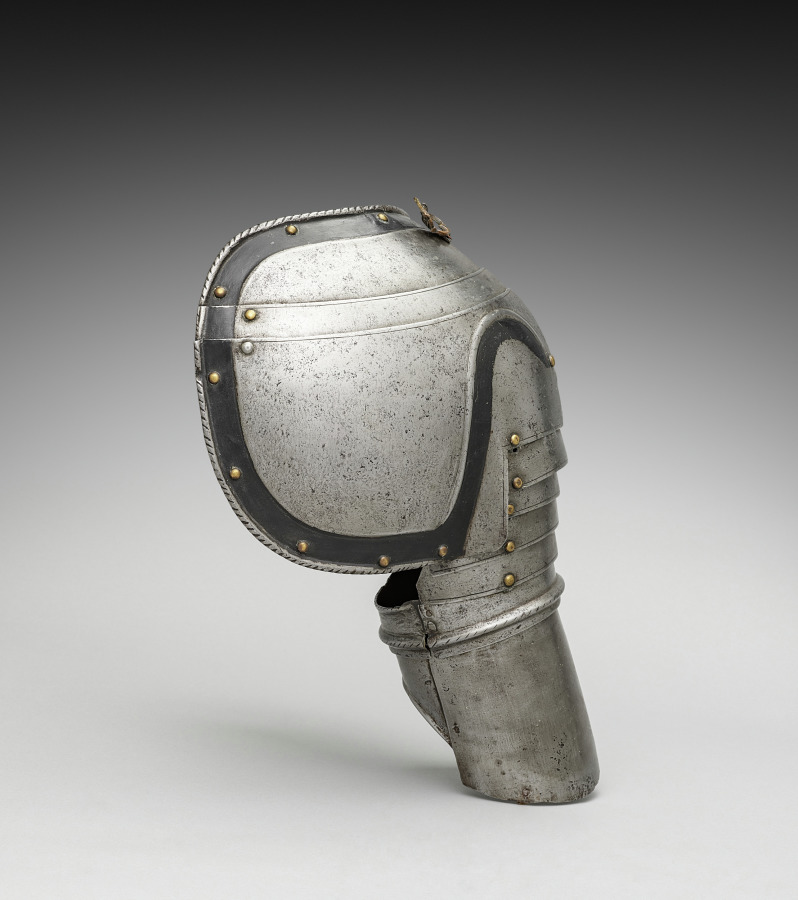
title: Right Pauldron with Rerebrace (upper cannnon)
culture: Germany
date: c.1550–1570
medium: iron, steel, leather and brass rivets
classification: Arms and Armor